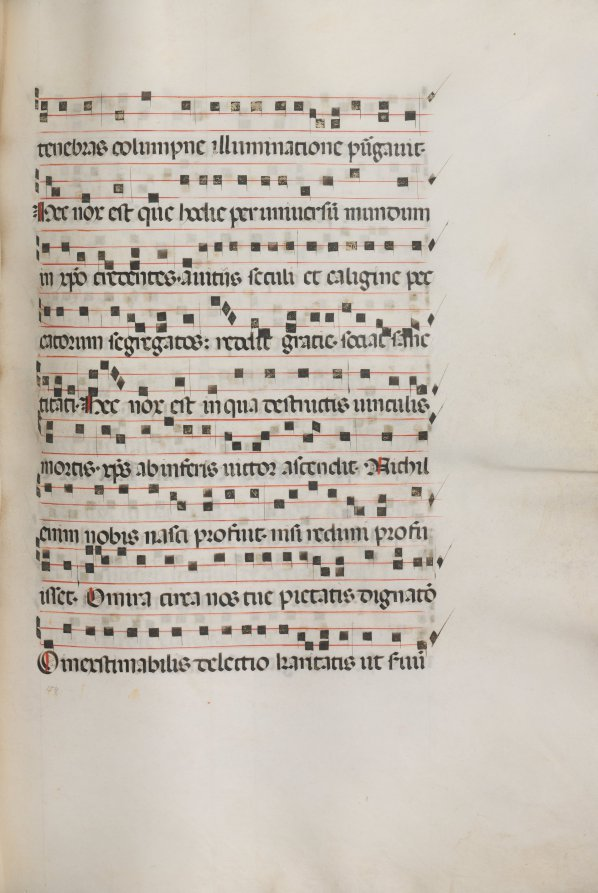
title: Missale: Fol. 155: Music for "Exultet"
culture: Italy, Perugia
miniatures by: Bartolommeo Caporali (Italian, c. 1420–1503)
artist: assisted by Giapeco Caporali (Italian, d. 1478)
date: 1469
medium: ink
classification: Bound Volume